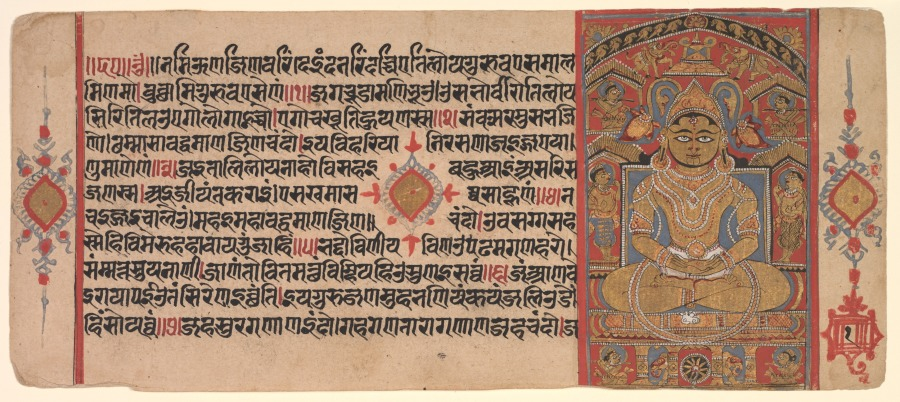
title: Seated Jina Rishabha Enshrined, from a Jain Manuscript: Kalpa-Sutra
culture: Western India, Gujarat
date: c. 1500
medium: Gum tempera, ink, and gold on paper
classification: Painting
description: By the 1400s, paper had replaced palm leaves as the primary support for Jain manuscripts. Although binding strings were no longer passed through holes in the manuscript, since they would tear the paper, the location of the holes was maintained by means of ornamented gold lozenges. Followers of Jainism commissioned copies of sacred manuscripts in order to accrue spiritual merit for themselves and their families; adorning the manuscript with paintings increased the merit. The main figure, painted in gold, sits in eternal meditative bliss, bejeweled to denote his success in reaching liberation. His long hair and the tiny, white bull beneath his crossed ankles identify him as Rishabha.